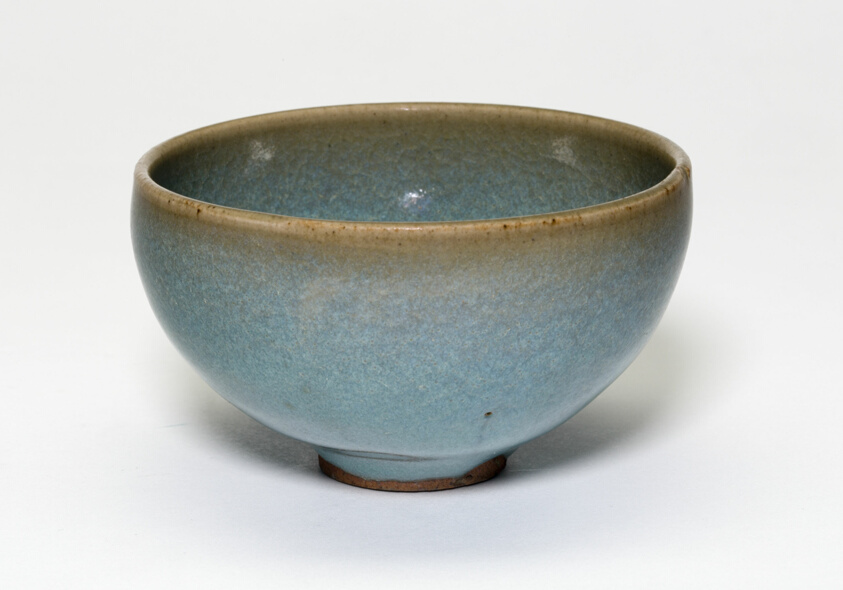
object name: Vessel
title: Cup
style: Chinese (culture or style)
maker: China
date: Northern Song dynasty (960–1127)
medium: Jun ware; stoneware with light blue glaze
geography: China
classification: drinking vessel; stoneware; asian art; ceramics; vessel